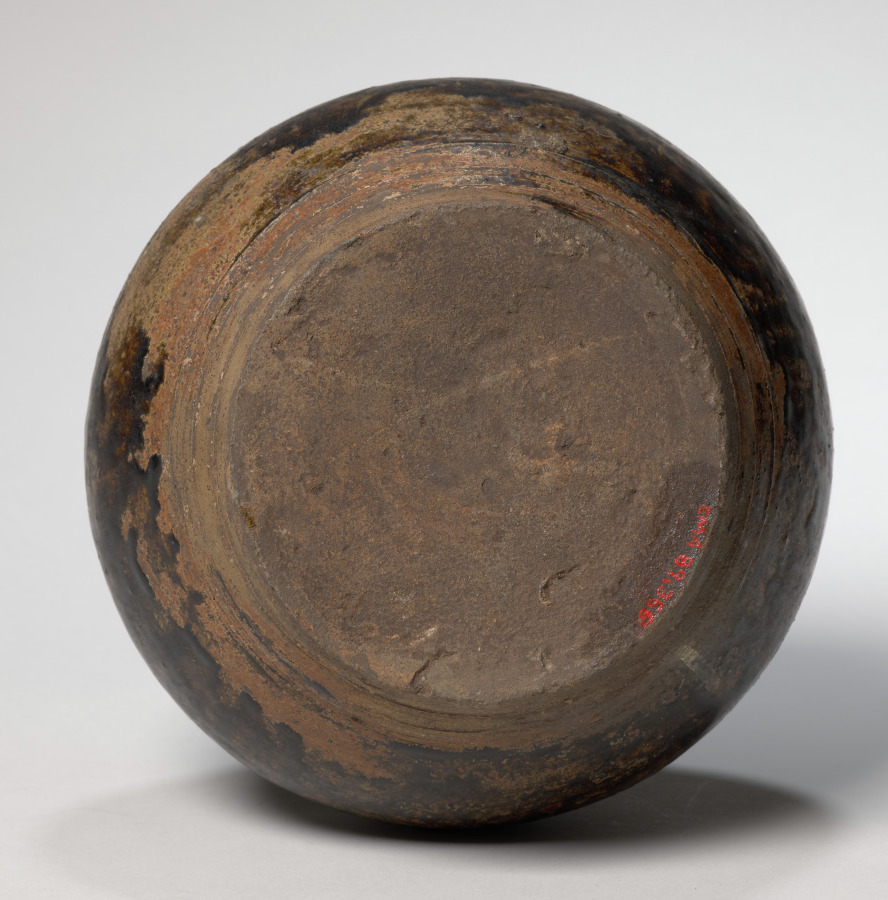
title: Khmer Vase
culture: Cambodia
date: 1100s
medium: earthenware with dark brown glaze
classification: Ceramic